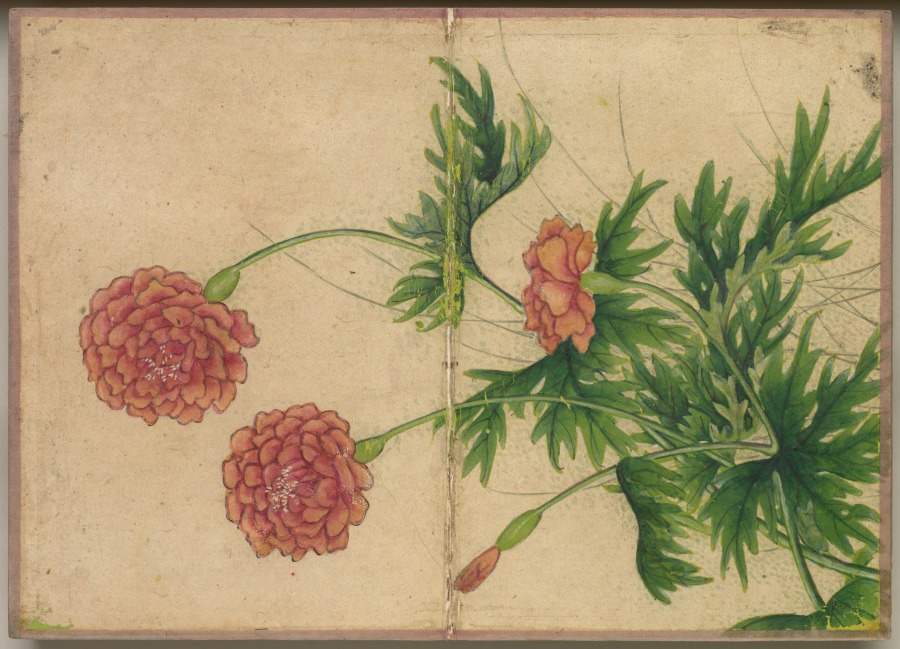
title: Desk Album: Flower and Bird Paintings (Peony)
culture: China, Qing dynasty (1644-1911)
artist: Zhang Ruoai (Chinese, 1713–1746)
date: 1700s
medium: album leaf, ink and color on paper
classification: Painting